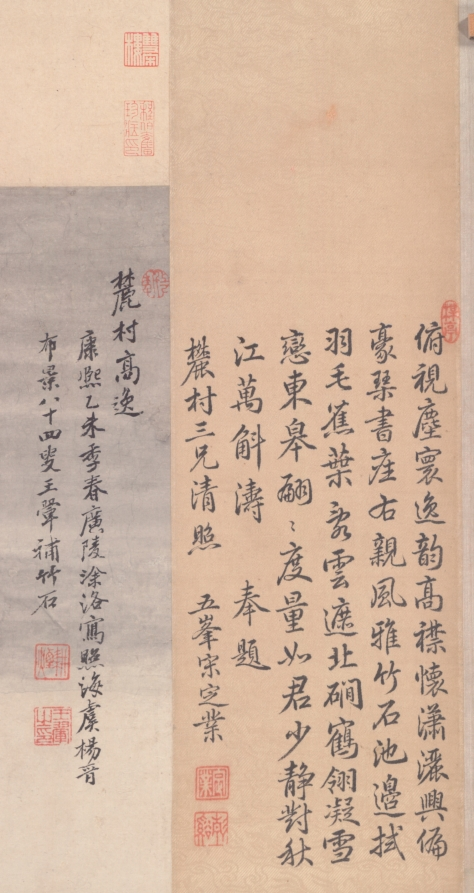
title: Portrait of An Qi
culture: China, Qing dynasty (1644-1911)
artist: Wang Hui (Chinese, 1632–1717)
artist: Tu Luo (Chinese, active c. 1715)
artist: Yang Jin (Chinese, 1644–1728)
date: 1715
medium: hanging scroll; ink and color on paper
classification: Painting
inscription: [印]上下千年. 麓村高逸：康煕乙未季春，廣陵涂洛寫照，海虞楊晉布景，八十四叟王翬補竹石。[印]耕煙; 王翬之印.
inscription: 俯視塵寰逸韻高，襟懷潚灑興偏豪。/ 琴書座右親風雅，竹石池邊拭羽毛。/ 蕉葉亂雲遮北礀，鶴翎凝雪戀東皋。/ 翩翩度量如君少，靜對秋江萬斛濤。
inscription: 知君頗好道，作意洗緐縟。/ 遂窮林亭勝，翛然契幽獨。/ 自得會忘言，餘善時往復。/ 岸幘若有期，把卷一停讀。/ 鶴馴行載正，雲閑斷還續。/ 橘柚欎寒煙，芭蕉瀉深綠。/ 石橋逕屢迴，暗水流亦曲。/ 真心恣奇探，曠景縱遐矚。/ 陶謝不可作，此旨更誰屬。/ 眷焉展斯圖，令我怡心目。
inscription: 逸興迥絶塵，風流仰高躅。/ 側無鹿角巾，横呈豹皮褥。/ 胸藏山壑富，座列琴囊足。/ 橙懸萬顆黄，蕉散一叢綠。/ 泉清鶴景長，樹遠雲光續。/ 披圖識性情，伊人温似玉。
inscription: 風雅出塵寰，披圖見一斑。/ 橘香新雨後，竹影夕陽間。/ 流水鳴前澗，歸雲渡遠山。/ 幽棲如可遂，應許共追攀。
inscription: 蕭灑披襟坐，琴書逸興長。/ 衫分蕉葉碧，冠學竹皮黄。/ 高樹穿雲斷，流泉帶菊香。/ 幽懷真曠達，何地不羲皇。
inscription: 秋色滿林壑，孤琴獨玄閒。/ 境歸簪紱外，道在水雲間。/ 棄智如藏璞，栖心静若山。/ 看君此圖畫，永以謝塵顏。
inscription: 修竹叢蕉坐綠天，君容早歳已如仙。/ 山中寄謝王摩詰，頭白方知住輞川。/ 千樹勝封萬戸侯，西風載滿李衡舟。/ 看君高致輕軒冕，坐享江鄉富貴秋。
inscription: 6 seals unidentified.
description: An Qi, the subject of the portrait, was a second-generation salt merchant from Korea. He used part of his wealth to collect art. At the time this painting was commissioned, An was less than 40 years old. He is represented as a Daoist recluse in nature, informally dressed with attributes such as books and a wrapped guqin instrument, a portrait convention for literati-scholars since the Six Dynasties period (220–589 CE). The local Taihu rock, banana plants, and crane suggest a southern garden and a life in seclusion. An’s portrait is evidence of merchants aspiring to the scholar-official class. According to the inscription, this painting was the joint effort of three men, the eldest and most famous was Wang Hui. While the garden setting is homogenous in style, it contrasts with the application of opaque pigments and shading employed for the depiction of An Qi’s face.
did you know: Seven of An Qi's close friends wrote poetic inscriptions on the silk brocade mount around his portrait.